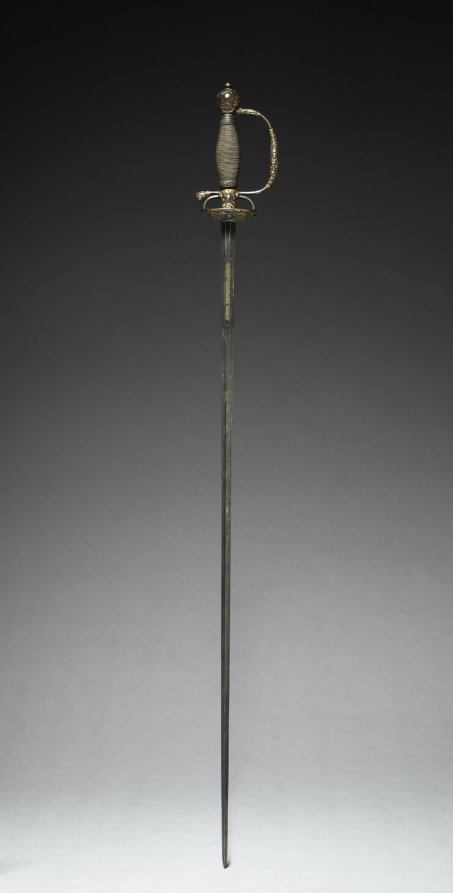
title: Child's Sword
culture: France, Paris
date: c 1780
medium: stainless steel, silver and brass wire inlay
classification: Arms and Armor